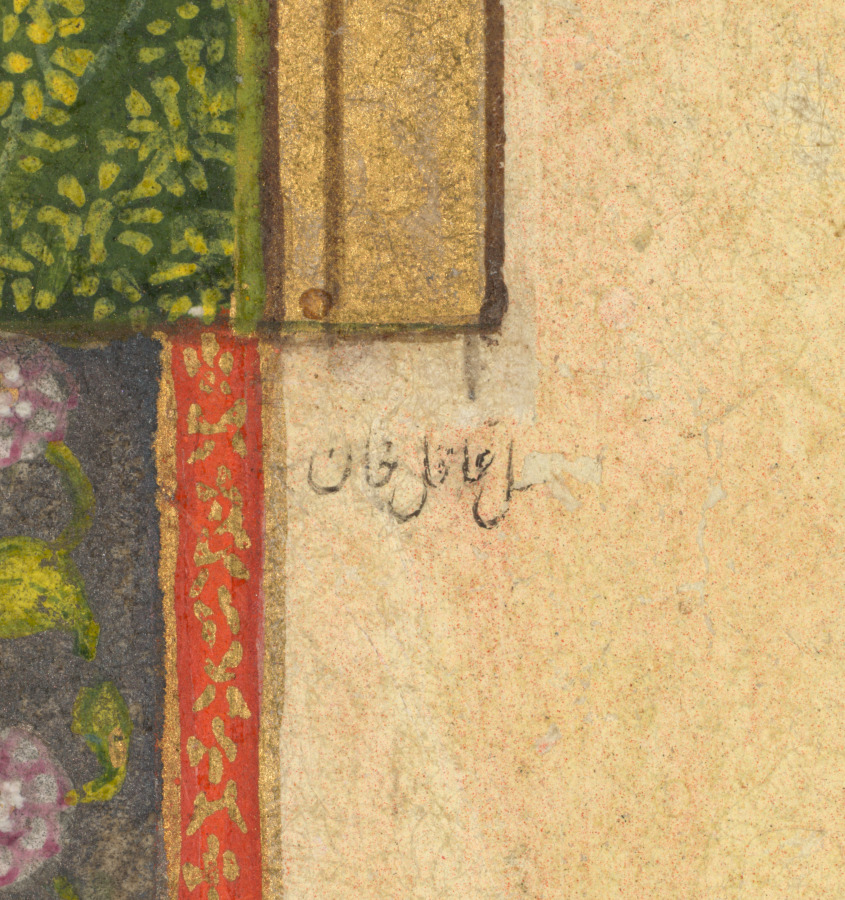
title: Princess and attendant in trompe l’oeil window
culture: Mughal India, Uttar Pradesh, Lucknow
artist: Aqil Khan (Indian, active mid-1700s)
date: c. 1765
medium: Gum tempera, ink, and gold on paper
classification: Painting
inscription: 'amal 'Aqil Khān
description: A golden window shade has been rolled up to reveal a princess seated on a terrace. The carpet draped over the sill echoes that of the balcony rail where royals would show themselves to the public. Rather than taking the view of an outsider, the viewer looks from inside the palace out to the women and the wooded landscape beyond. During the mid-1600s, the Mughal court introduced a preference for the patterns on carpets and textiles: flowering plants on a plain ground. This influential fashion derived from their appreciation of European botanical studies that merchants and diplomats brought to India.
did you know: Unlike in portraits of the emperor, women sit on the outside of the royal window.